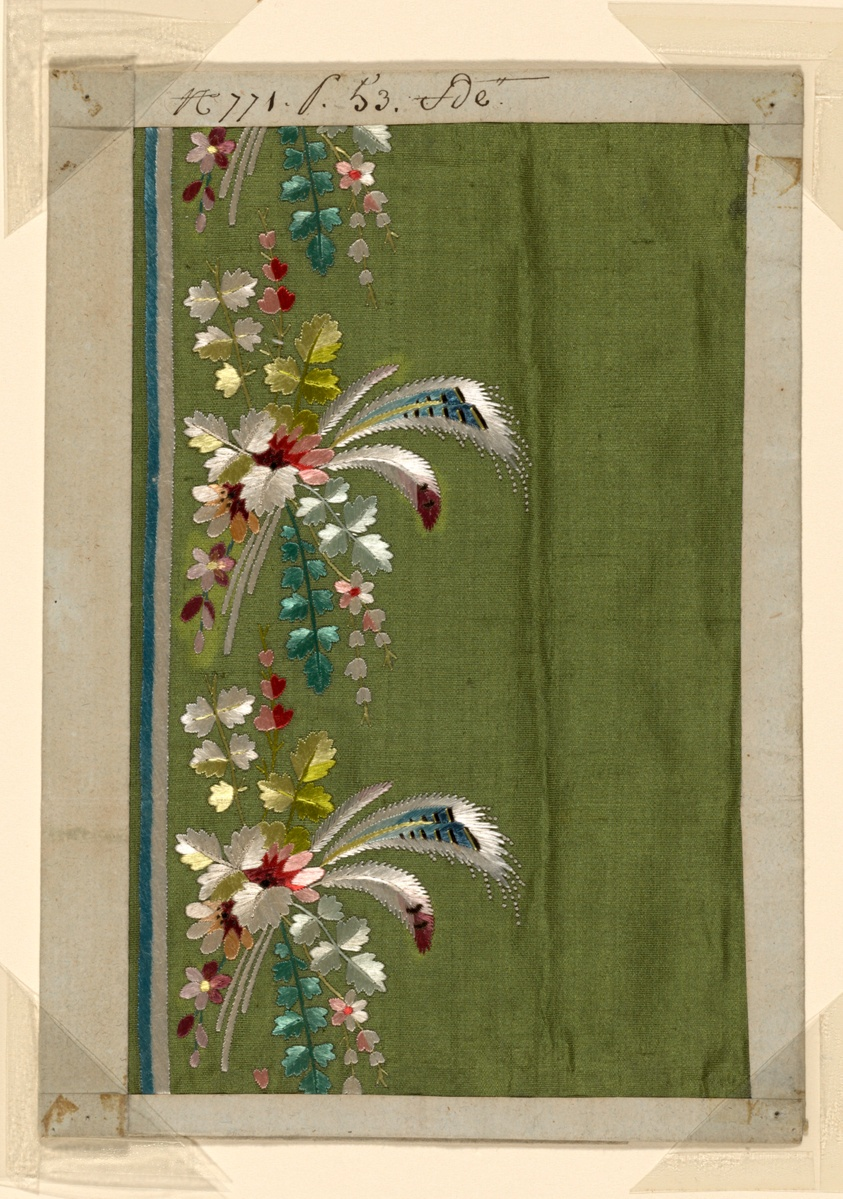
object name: Textile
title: Salesman's Sample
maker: Probably France, Lyon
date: 1780-1810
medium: Silk, warp-faced plain weave; embroidered with silk floss in outline and satin stitches; French knots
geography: France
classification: textile; needlework (visual works); costume; costume - embroidery; embroidery; needlework - costume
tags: flowers, foliage, flora